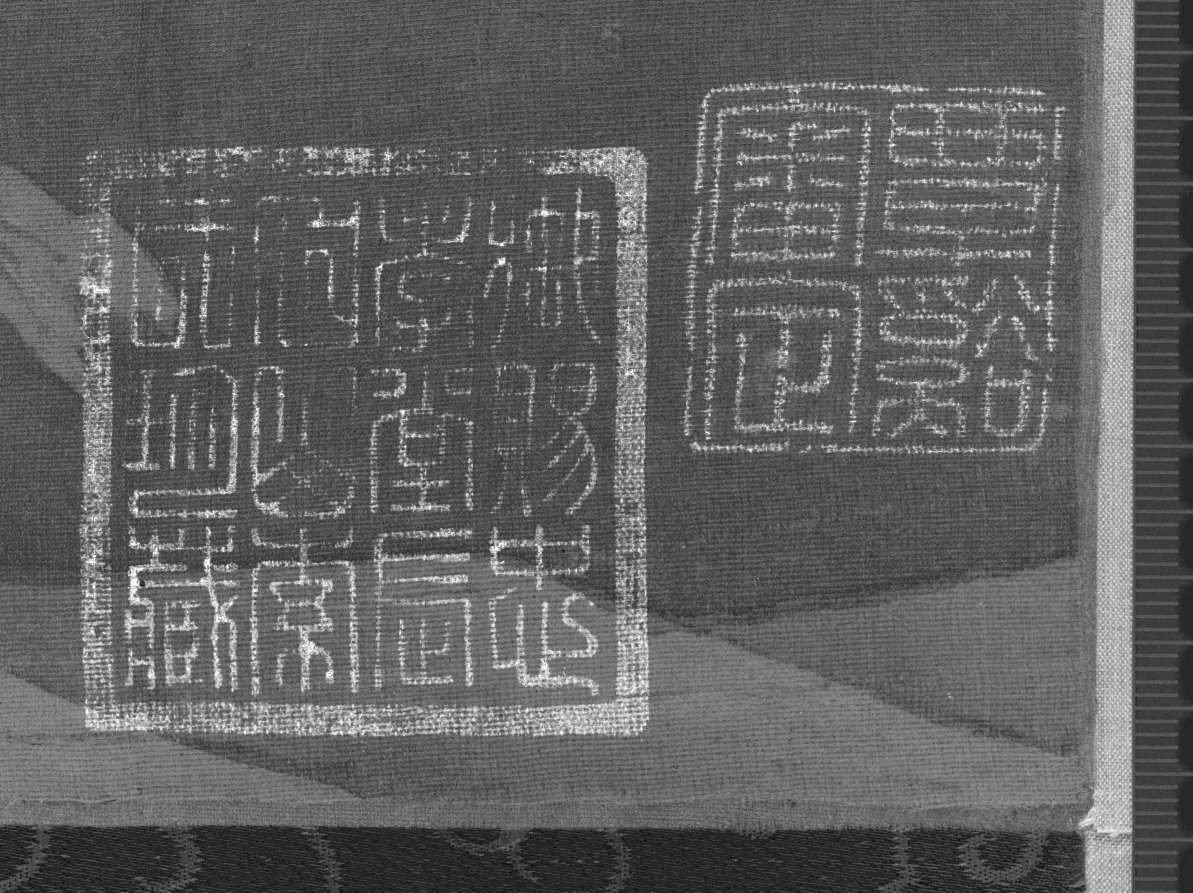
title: Birds in a Grove in a Mountainous Winter Landscape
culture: China, Jin dynasty (1115-1234)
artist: possibly by Gao Tao (Chinese, 1100s)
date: 1100s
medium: hanging scroll; ink and slight color on silk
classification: Painting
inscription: A signature and a seal at lower left edge: Gao Tao 高燾; seal undecipherable. 10 additional seals: 1 of Zhu Gang 朱棡 [1358–1398]; 3 of Suo’etu 索額圖 [1636–1703]; 2 of A’erxipu 阿爾喜普 [1700s]; 1 of Weng Fanggang 翁方綱 [1733–1818]; 3 unidentified.